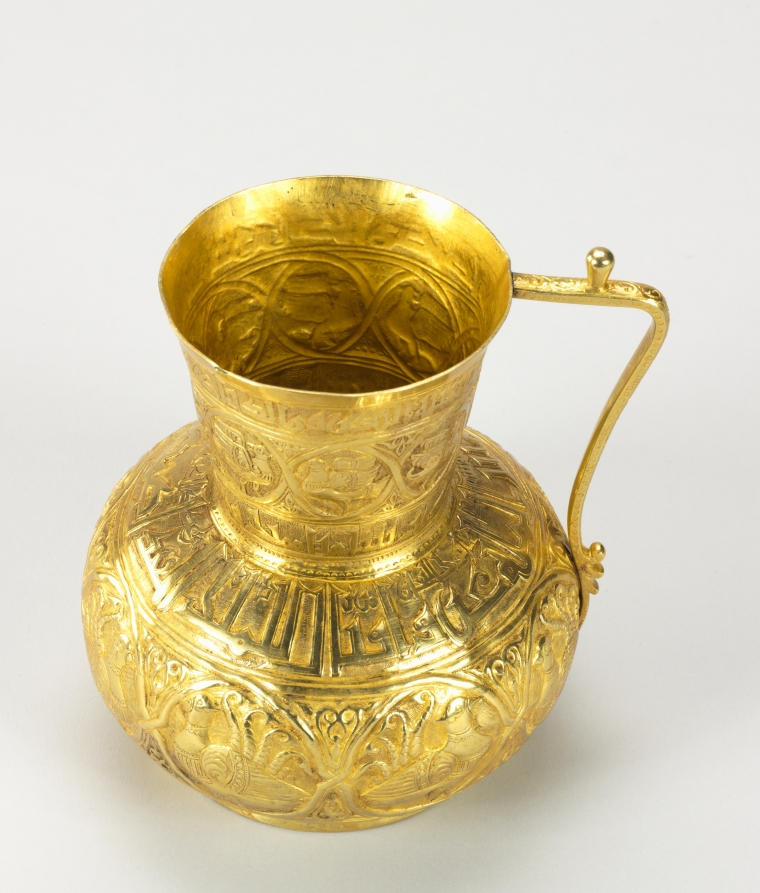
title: Jug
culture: Iran or Iraq, Baghdad, Buyid Period, reign of Samsam al-Dawla (985-998 AD)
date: late 900s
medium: gold with repoussé and chased and engraved decoration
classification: Metalwork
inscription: The inscription bands contain Arabic poetry which translates, in part: "You are the image of the full moon at night, the first gleam of sun on the horizon of the morning. You are a sword in the times of war, a beneficent rain in times of peace...your sword cuts the necks of Buyid enemies in great quantities...Glory and prosperity to the just king Samsam al-Dawla...May God lengthen your reign!"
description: This jug is one of the rare surviving Islamic vessels made entirely of precious metal. Its inscription bands contain Arabic poetry that translates, in part: "You are the image of the full moon at night, the first gleam of sun on the horizon of the morning. You are a sword in the times of war, a beneficent rain in times of peace . . . your sword cuts the necks of Buyid enemies in great quantities . . . Glory and prosperity to the just king Samsam al-Dawla . . . May God lengthen your reign!"